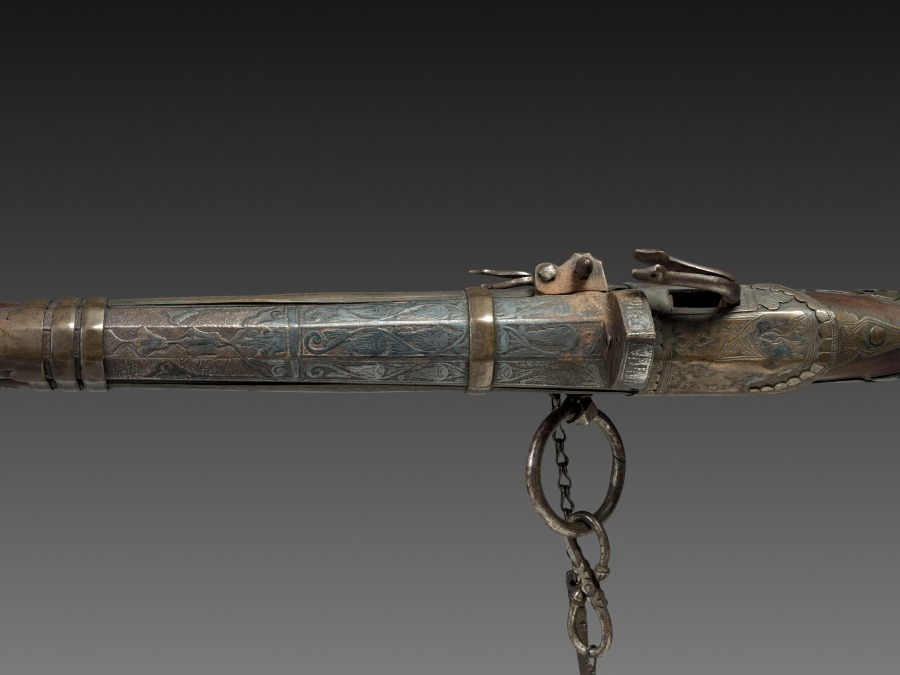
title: Matchlock Musket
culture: Turkey, Ottoman period (1299–1922)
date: c. 1750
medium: Wood, steel, brass, mother-of-pearl inlay, and leather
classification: Arms and Armor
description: Collectively, the Safavid, Mughal, and Ottoman empires are known as the Gunpowder Empires. Particularly from the 1500–1700s, they were among the strongest economic, cultural, and militaristic powers. Each trained and equipped their armies with the latest gunpowder firearms, particularly cannons and muskets. While used in battle, muskets were also used for leisure activities, particularly hunting. The decoration on this musket suggests it was a courtly item, fitted with a leather pad to protect the shooter from the force of the explosion after firing.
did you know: A matchlock musket was loaded from the muzzle end with a scouring stick kept in a sleeve on the underside of the barrel.